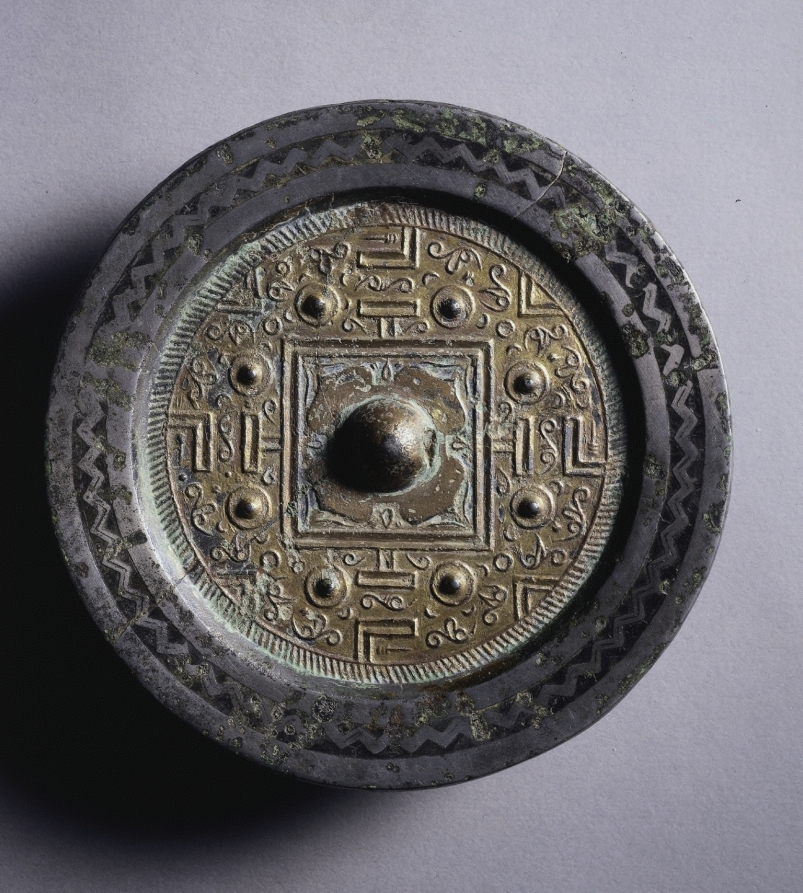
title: TLV Mirror with Gilt Surface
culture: China, Western Han dynasty (206 BCE–8 CE)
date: 100s BCE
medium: gilt bronze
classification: Metalwork